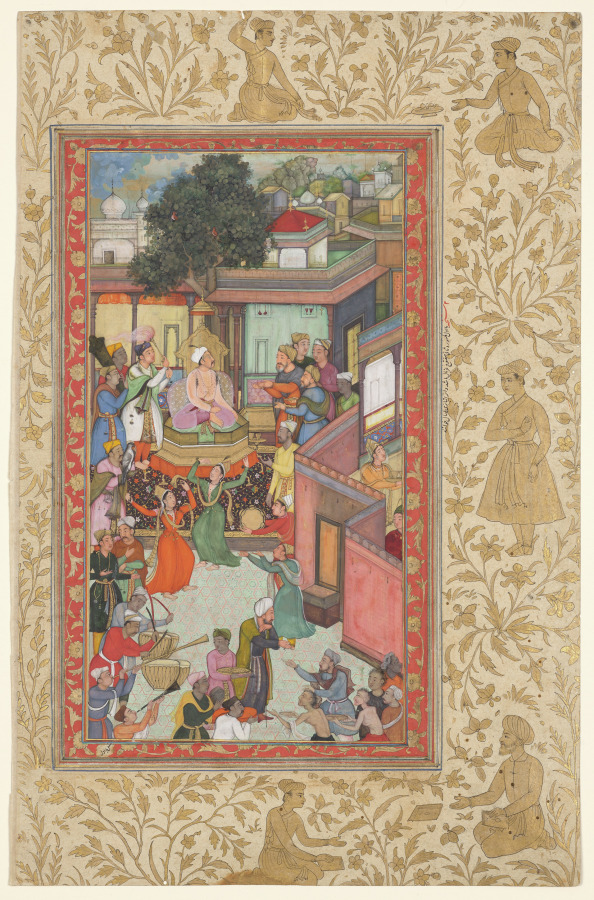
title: Circumcision ceremony for Akbar’s sons, painting 126 from an Akbar-nama (Book of Akbar) of Abu’l Fazl (Indian, 1551–1602)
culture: Mughal India, court of Akbar (reigned 1556–1605)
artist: attributed to Dharam Das (Indian, active c. 1580–1605)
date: c. 1602–3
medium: gum tempera, ink, and gold on paper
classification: Painting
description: This page is from a copy of the biography of Akbar that was completed not long before his death in 1605. It depicts him much younger, during the festivities held on October 22, 1573, in his newly built capital city of Fatehpur Sikri, near Agra, on the occasion of the circumcision ceremony for his three young sons. Dancers in Chaghatai Turkish dress perform as Akbar’s weight in gold is being distributed to the poor. Akbar wears a simple white tunic, or jama, stained at the armpits by aromatic musk. A curved dagger in a red velvet sheath is tucked into his golden sash, and he is crowned with a white crested turban.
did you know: An attendant strokes Akbar’s hunting falcon, perched on a glove.